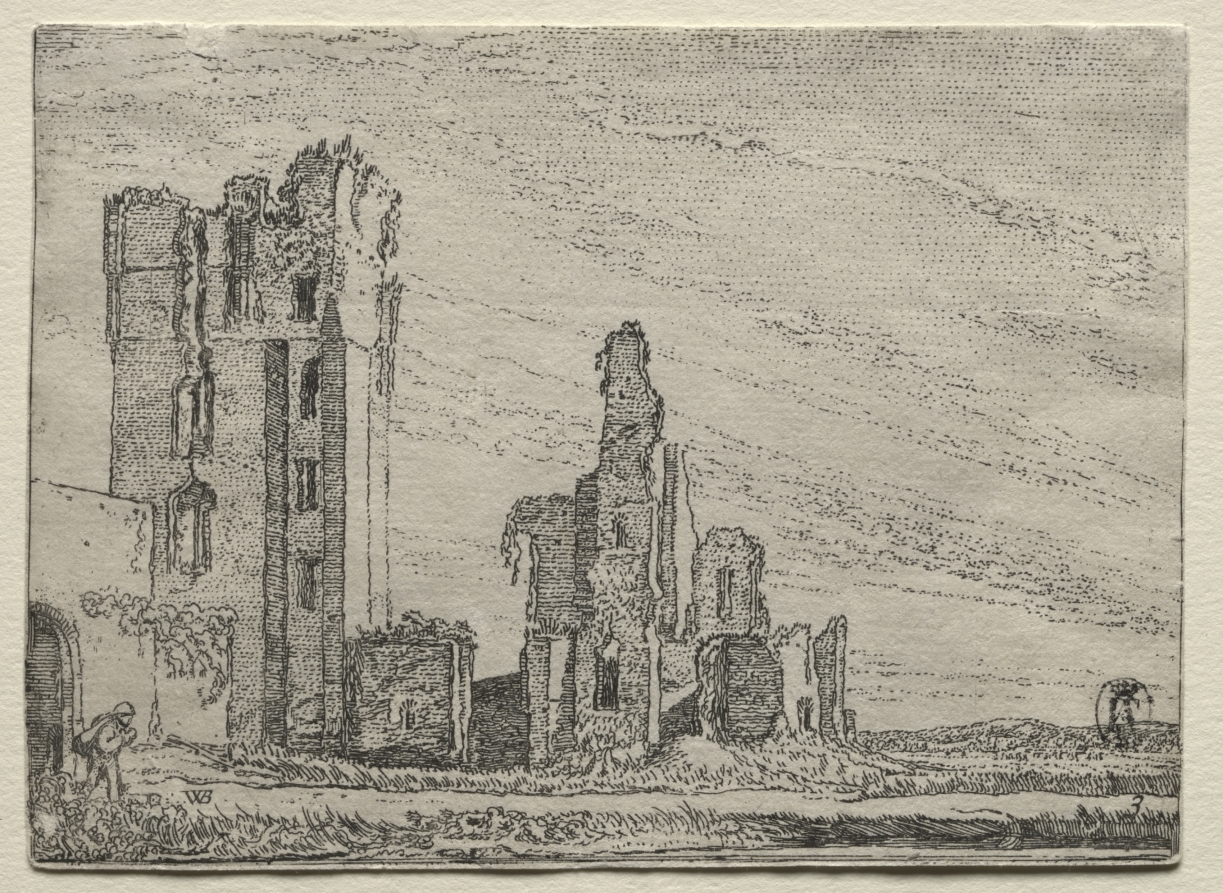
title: Ruins of the Castle Huys Te Kleef near Haarlem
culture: Netherlands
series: Various Lanscapes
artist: Willem Pietersz Buytewech (Dutch, 1591/92–1624)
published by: Claes Jansz Visscher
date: c. 1616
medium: etching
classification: Print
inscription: lower left, in plate: WB[in monogram] ; lower right, in monogram: 3 ; lower left, in graphite: [illegible inscription] ; lower center, in graphite: vd K 30 ; VERSO, lower right, in graphite: Willem Buytewech / Huys te Kleef